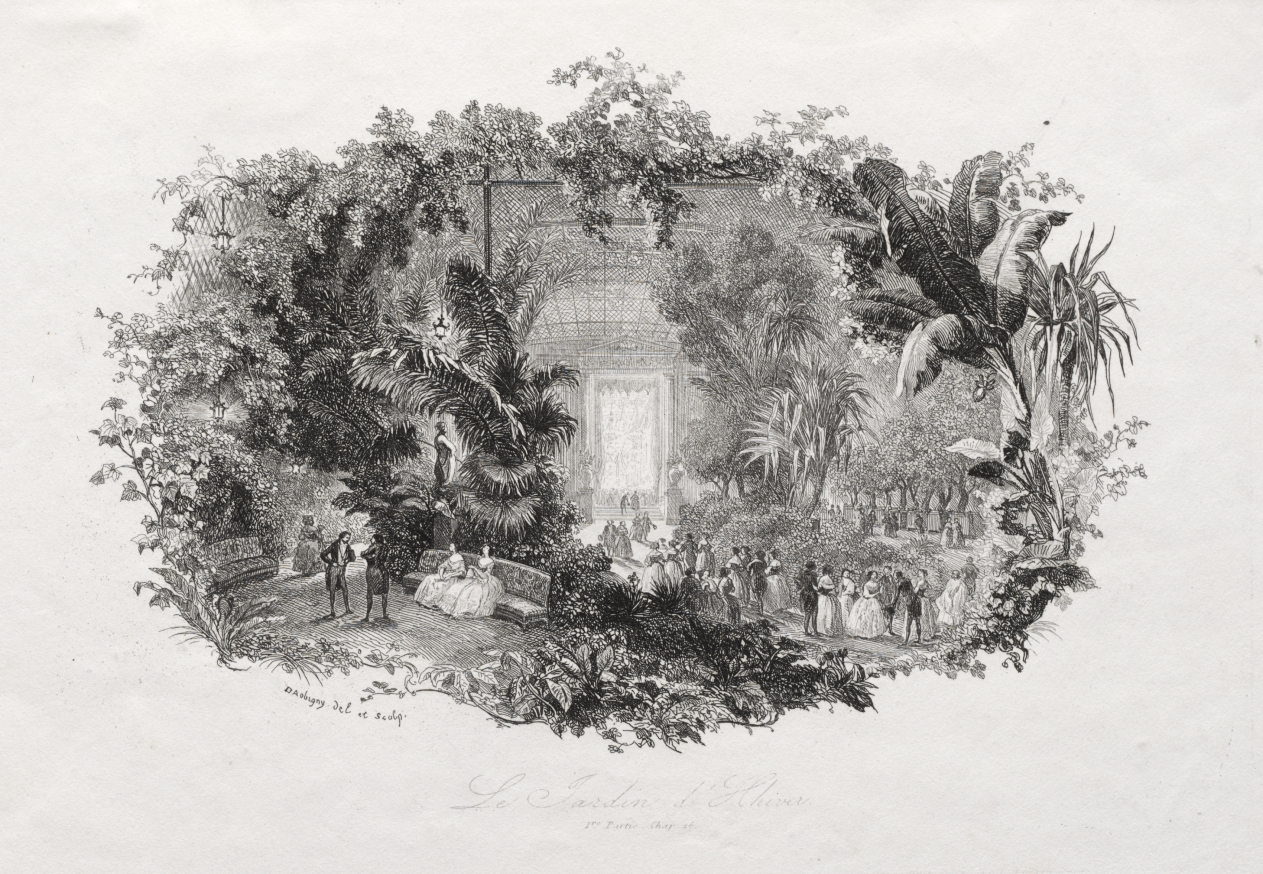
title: The Winter Garden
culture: France, 19th century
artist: Charles François Daubigny (French, 1817–1878)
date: 1842–1843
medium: etching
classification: Print